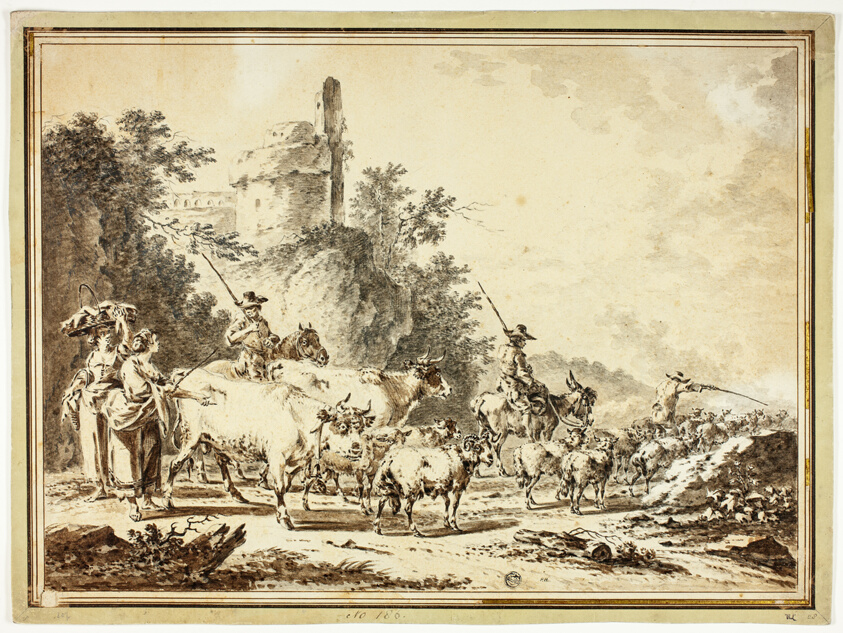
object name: Drawing and Watercolor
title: Herdsmen, Cattle and Sheep Passing Two Maidens, with Ruined Castle on Hill Above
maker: Follower of Claes Pietersz. Berchem (Dutch, 1620-1683); or School of Karel Dujardin (Dutch, c. 1622-1678)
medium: Black chalk, with brush and gray and brown wash, on ivory laid paper, laid down on card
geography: Netherlands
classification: ink or chalk wash; drawings (visual works); prints and drawing